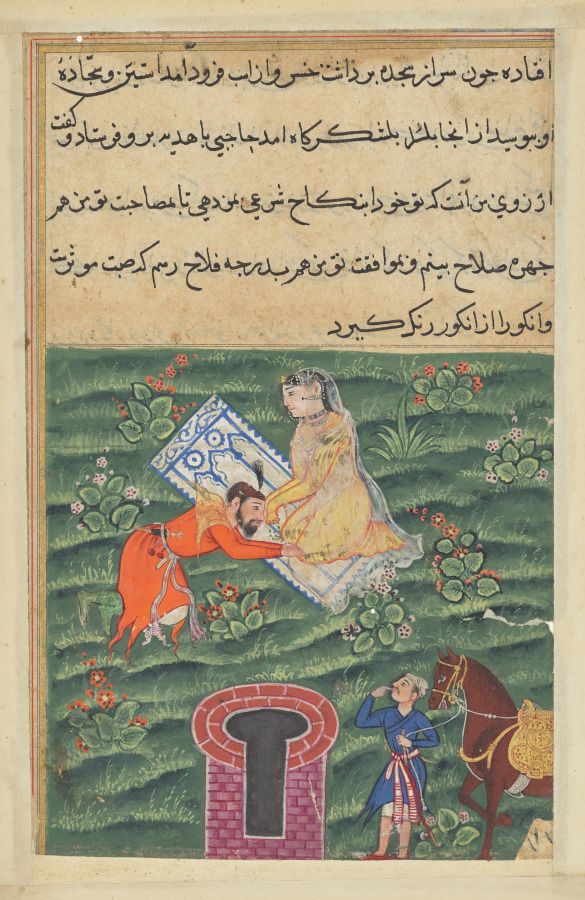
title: Khusrau, the King of Kings, pays homage to the pious daughter of Khassa, from a Tuti-nama (Tales of a Parrot): Fifty-first Night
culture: Mughal India, court of Akbar (reigned 1556–1605)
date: c. 1560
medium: gum tempera, ink, and gold on paper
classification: Painting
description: After being abandoned in the desert by her cruel husband, Khassa’s daughter is discovered by Khusrau, who is instantly captivated by her religious devotion. He proposes marriage and aptly punishes those who were cruel to her. The brick well that sustained her for many days in the desert is depicted in the foreground.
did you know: The woman kneels on a rug and holds prayer beads, signaling her Islamic faith.